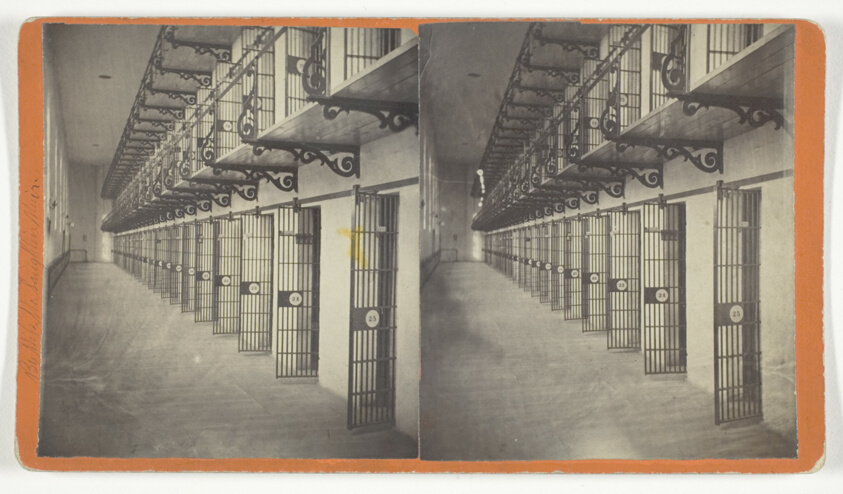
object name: Photograph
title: Untitled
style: 19th century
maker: Artist unknown; American, late 19th century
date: 1875/99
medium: Albumen print, stereo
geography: United States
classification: photography; photograph; albumen silver print; stereograph (albumen)